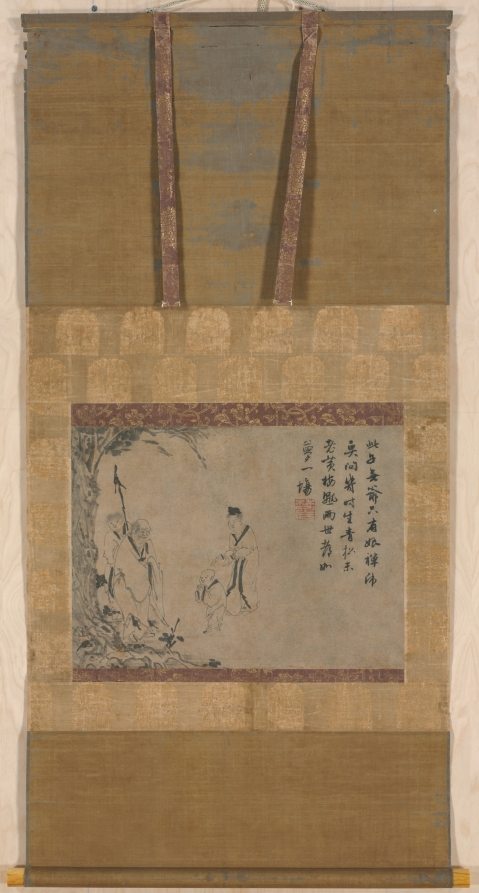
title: The Second Coming of the Fifth Patriarch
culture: China, Yuan dynasty (1271-1368)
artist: Yintuoluo (Chinese, c. 1285-c. 1355)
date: c. mid-1300s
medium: section of a handscroll mounted as a hanging scroll, ink on paper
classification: Painting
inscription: [印] 人言洞裡桃花源，未必人間有此枝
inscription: 此子無爺只有娘，禪師莫問幾時生。 青松未老黃梅飄，兩世都如夢一場。 [印] 楚石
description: A small boy, accompanied by his mother, is closing his hands in greeting to an old monk who has a young attendant standing behind him. Scholars believe the scene is a meeting between the fourth patriarch of Chan Buddhism, Daoxin 道信, and the little boy, who was the reincarnation of an old monk named Zaisong daozhe 栽松道者 (Pine Planter). They had encountered before, during which Daoxin advised the Pine Planter to endure a reincarnation as he was too old to reach enlightenment. This painting is done by Yintuoluo, an artist renowned for his simple and unadorned style.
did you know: This painting is just a section of a handscroll that has been remounted as a hanging scroll.